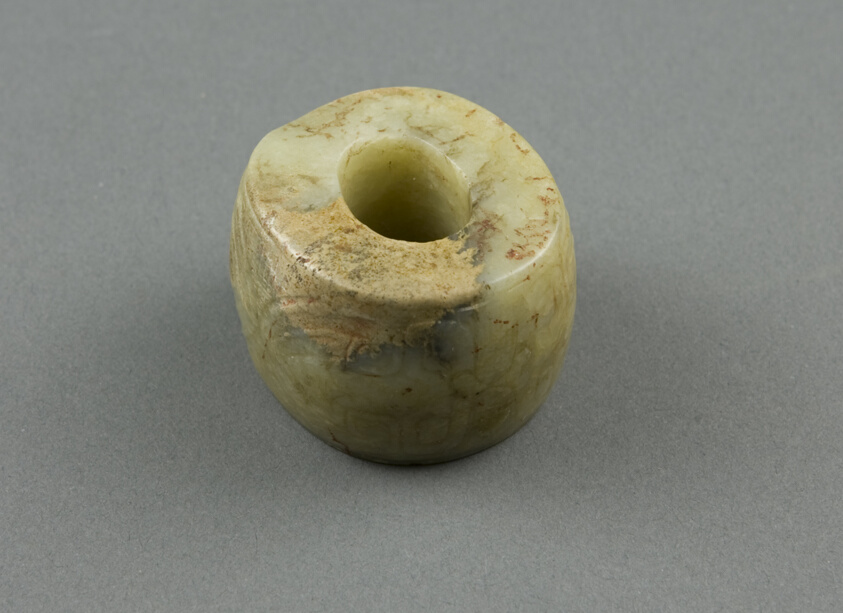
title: Bead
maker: China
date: Shang dynasty (c.1600–1050 BC)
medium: Jade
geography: China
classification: jade; asian art